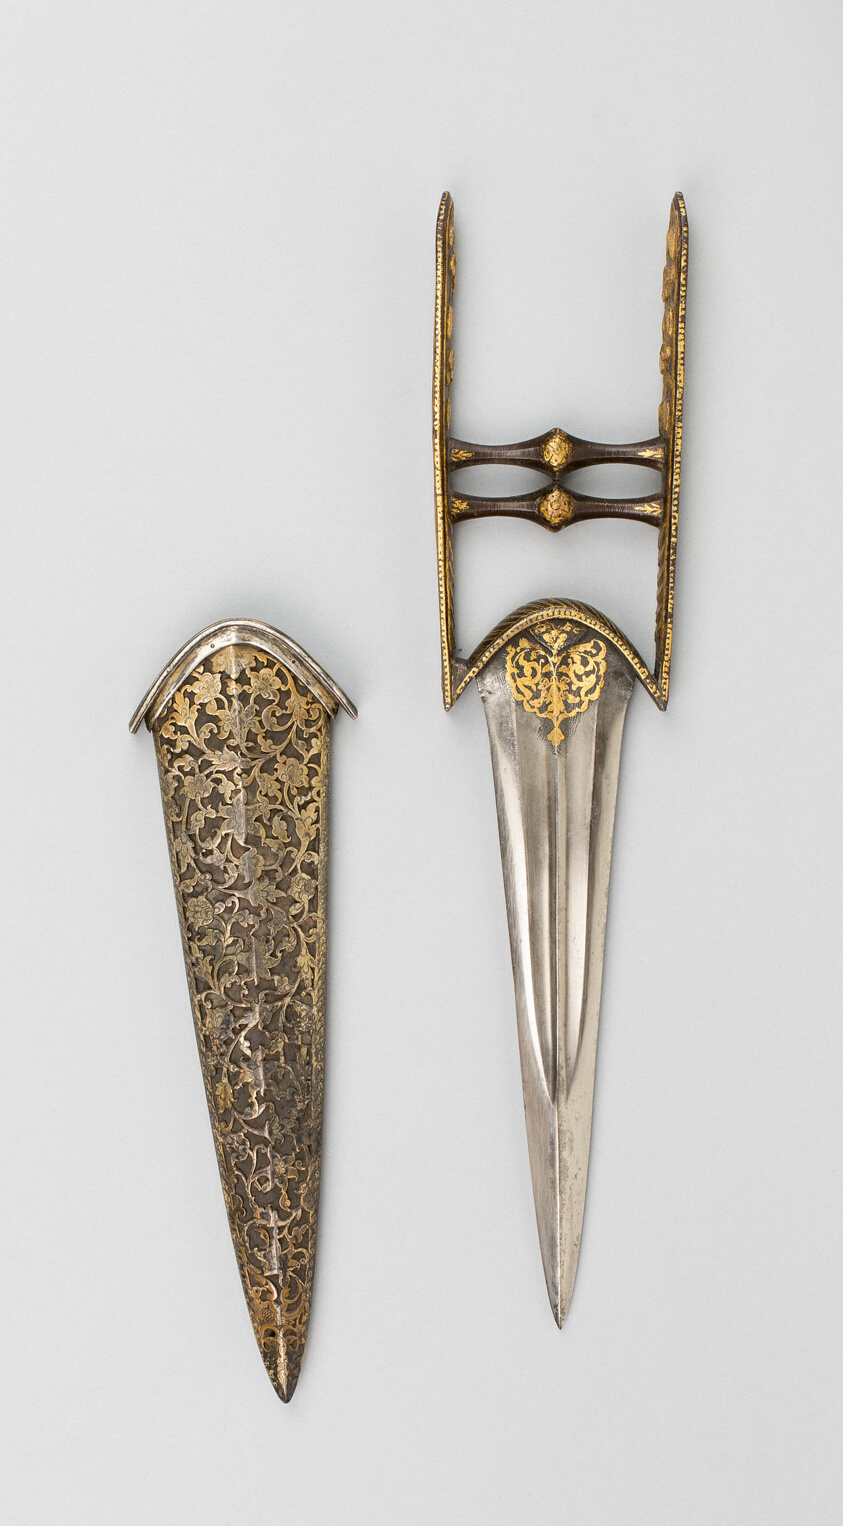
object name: Arms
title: Katar with Scabbard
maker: India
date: 17th–18th century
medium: Steel, gold, leather, and iron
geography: Turkey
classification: edged weapon-dagger; arms; arms and armor